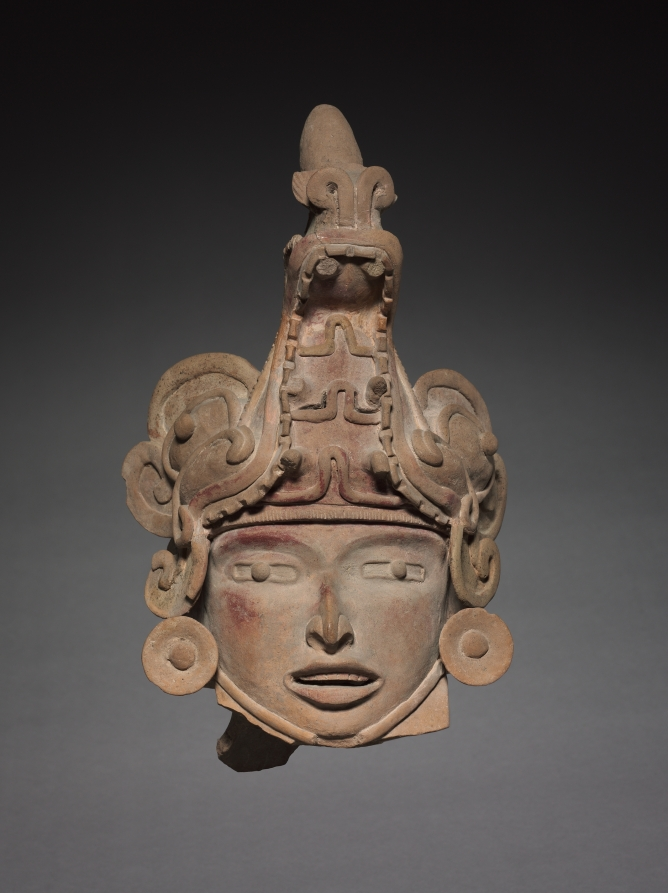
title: Head with Animal Helmet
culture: Mexico, Gulf Coast, San Andrés Tuxtla(?)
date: c. 600–1000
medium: earthenware, pigment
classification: Sculpture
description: The Gulf Coast of Mexico was an important center of ceramic sculpture production for more than 2,000 years. Nearly life-size hollow effigies, produced after about AD 600, are among the most spectacular works from this region. Although the faces were sometimes made with molds, this example appears to be hand-modeled. The mythical serpent helmet indicates that the figure may be a ritual performer.